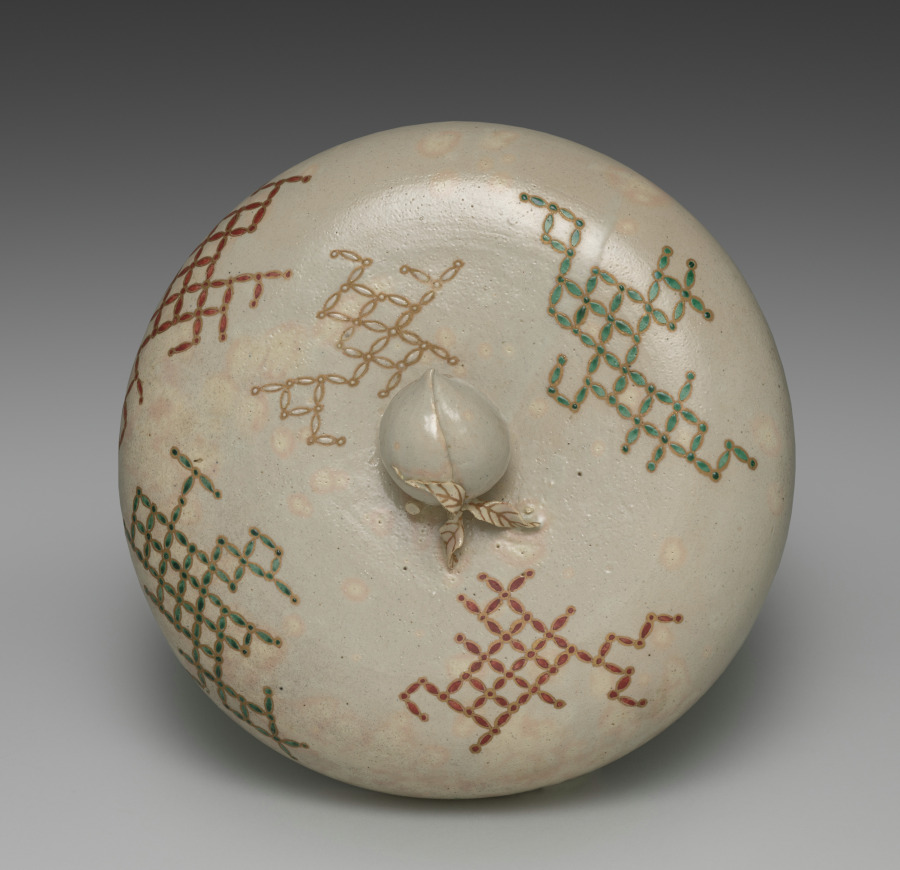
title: Cover for a Bowl with Seven Treasures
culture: Japan, Edo period (1615–1868)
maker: Seifū Yohei II (Japanese, 1844–1878)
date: 1861–78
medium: Stoneware with overglaze color enamel and gold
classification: Ceramic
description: While porcelain was their primary specialization, all the members of the Seifū studio also made stoneware painted with iron oxide designs under the glaze and with color enamel and gold over the glaze. Many examples are further characterized by pink dots brought out during firing and by crackling in the glaze. Works of this type are classified as Kyoto ware, after the city where the style developed. People used the ceramics for a diversity of purposes, from everyday dining to chanoyu, or Japanese tea practice.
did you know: At the center of the lid is a knob in the shape of a peach with a stem and leaves.